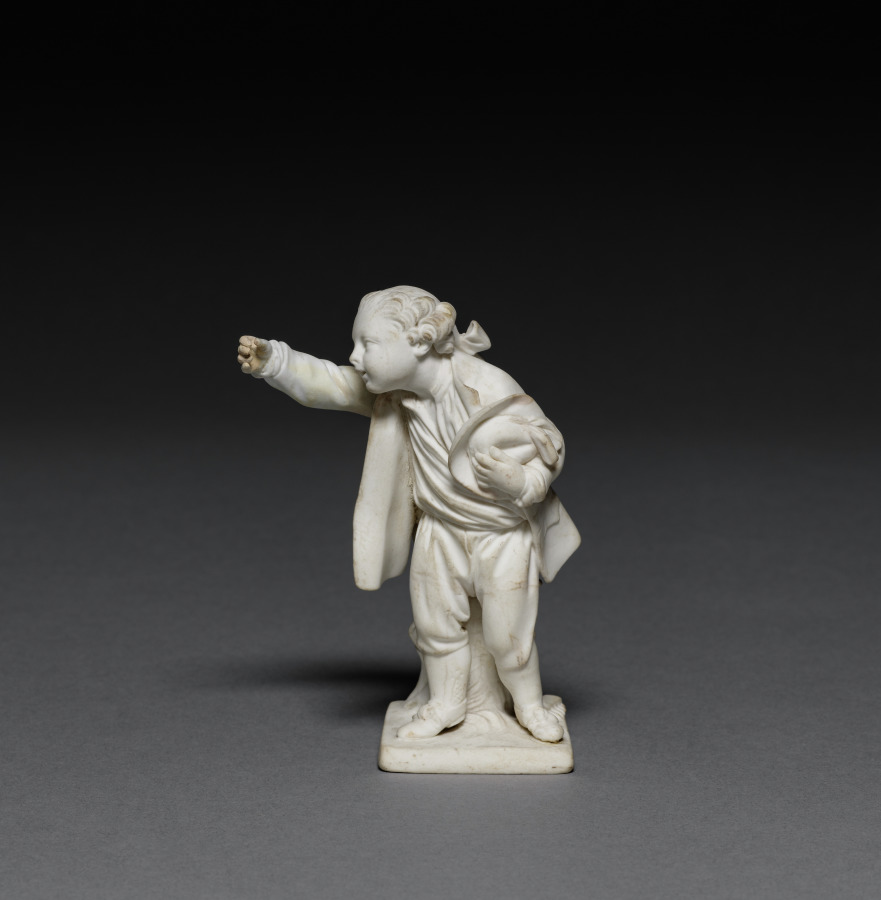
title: Figure of a Bird Charmer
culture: France, Sèvres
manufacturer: Sèvres Porcelain Factory (French, est. 1756)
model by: Etienne-Maurice Falconet (French, 1716–1791)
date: 1764–66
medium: Unglazed soft-paste porcelain (biscuit)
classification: Ceramic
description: Designs for 17 young children involved in various activities were issued by sculptor Étienne-Maurice Falconet and regularly reproduced as porcelain figurines. This figure, who stretches out his hand in anticipation that a bird might land, would have been modeled after one of these designs. Decorative figurines like these were often included in elaborate dining services to be placed about a table along with the usual tureens and tableware.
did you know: 31 figures modeled after Falconet’s series were included in the dinner service given by French King Louis XV to Christian VII, King of Denmark in 1768.